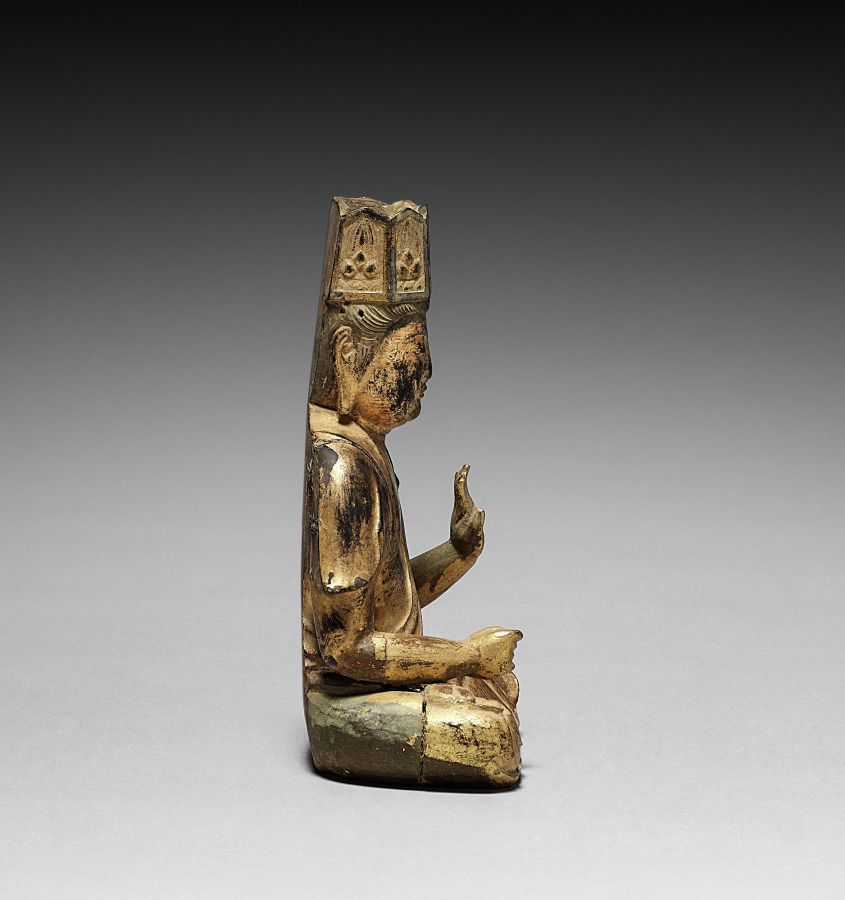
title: Bodhisattva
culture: Japan, Heian period (794–1185)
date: 900s-1100s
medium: gilded wood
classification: Sculpture